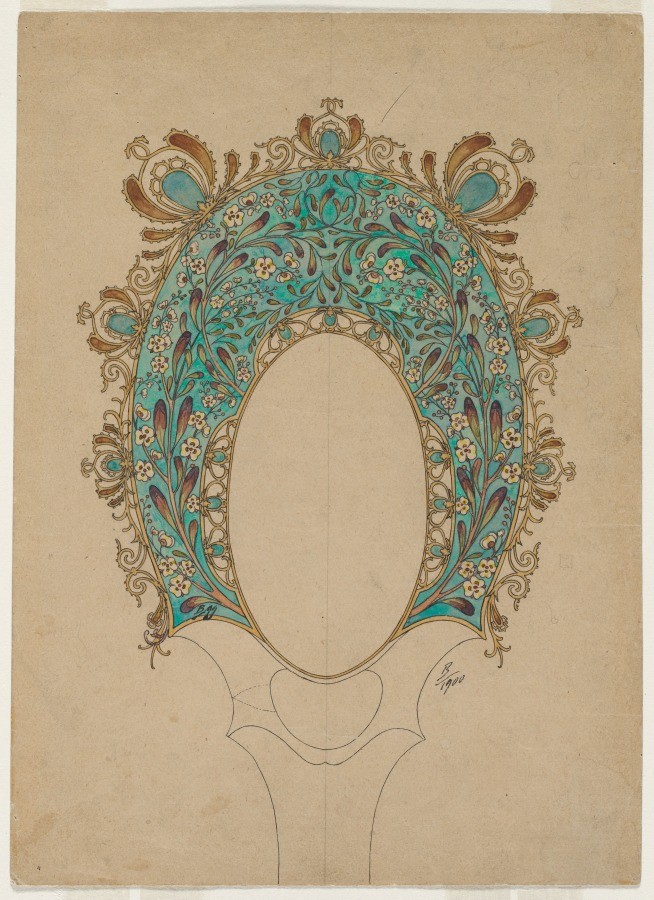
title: Designs for a Hand Mirror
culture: France, 20th century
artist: Félix Bracquemond (French, 1833–1914)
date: c. 1900–1902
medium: ink on paper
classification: Drawing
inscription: The window mat bears an inscription written in graphite pencil along the bottom edge: "ENCRE DE CHINE/ET/AQUARELLE/BRACQUEMOND (FELIX) - 1833 - 1914 PROJECTS DE MIROIR UTILISANT UN BAS RELIEF DE RODIN Rep_?_ Arts Decoration 1902 Tome XII p. 10 Pour le Baron Vita."